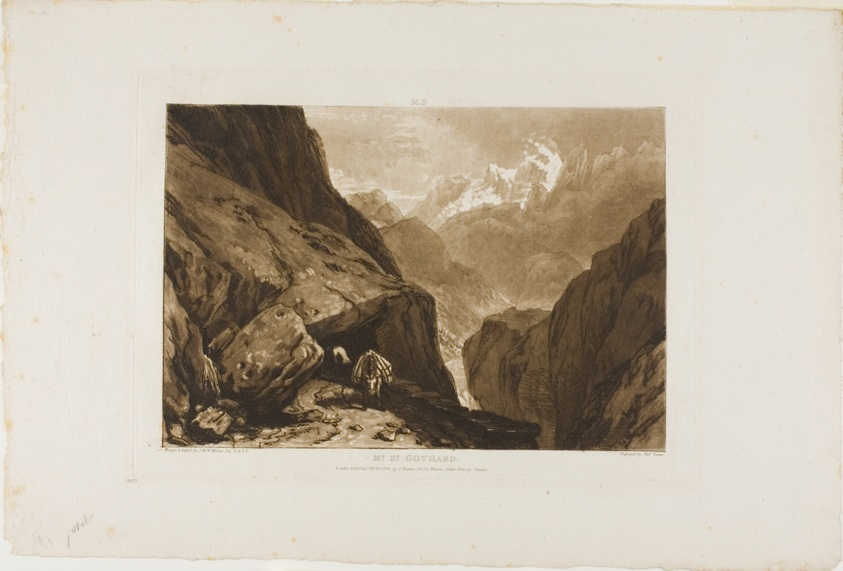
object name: Print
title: Mount Saint Gothard, plate 9 from Liber Studiorum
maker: Joseph Mallord William Turner (English, 1775-1851); Engraved by Charles Turner (English, 1773-1857)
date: published February 20, 1808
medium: Etching and aquatint in brown on ivory paper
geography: England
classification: etching; print; prints and drawing